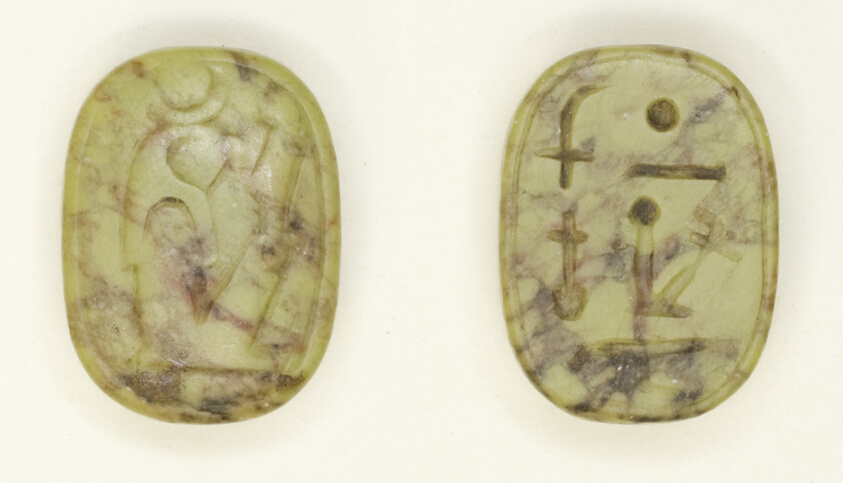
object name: Costume and Accessories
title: Plaque with Representation of God Khonsu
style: egyptian, ancient, new kingdom, third intermediate period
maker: Egyptian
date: New Kingdom–Third Intermediate Period (?), Dynasties 18–25 (about 1550–664 BCE)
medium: Jasper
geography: Egypt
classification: plaque (flat object); stone; amulet; ancient art; costume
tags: gods (deities), deities, Hieroglyphs